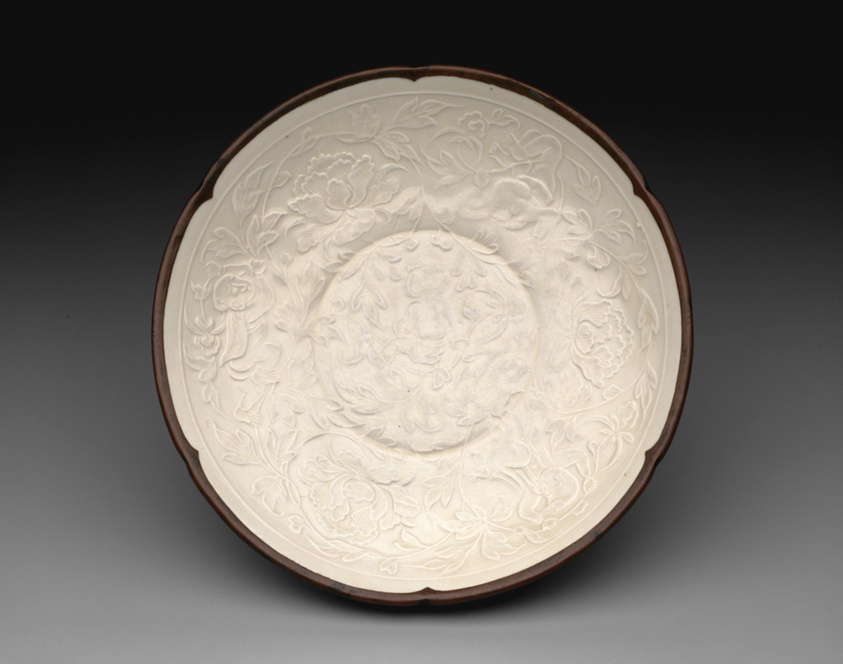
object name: Vessel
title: Dish with Peony Sprays and Four Boys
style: Chinese (culture or style)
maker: China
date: Jin dynasty (1115–1234), 12th century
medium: Ding ware; porcelain with underglaze mold-impressed decoration; metal rim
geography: China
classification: dish (vessel); porcelain; asian art; ceramics; vessel